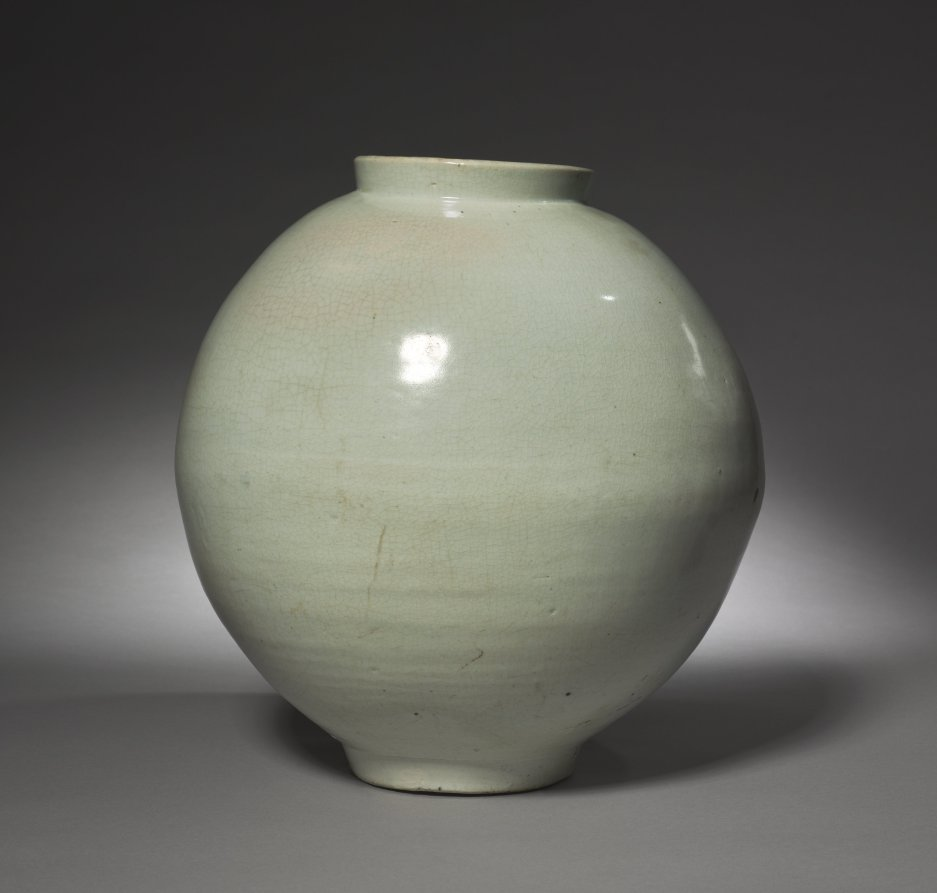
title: Jar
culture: Korea, Joseon dynasty (1392–1910)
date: 1700s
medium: glazed porcelain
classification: Ceramic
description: This white jar reflects values of frugality and pragmatism, political ideals encouraged by the ruling house’s government. The absence of underglaze cobalt blue decoration could be the artist’s response to the socioeconomic crisis caused by famines in the late 1600s. The Korean ruling house then enforced strict laws banning luxuries, including cobalt blue, to preserve state finances. Such challenges did not stop the artist from experimenting with a new aesthetics. The concept of minimalism, often phrased as “less is more,” is powerfully exercised in this jar.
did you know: Known as a “moon” jar, this vessel is named for its circular form and color.